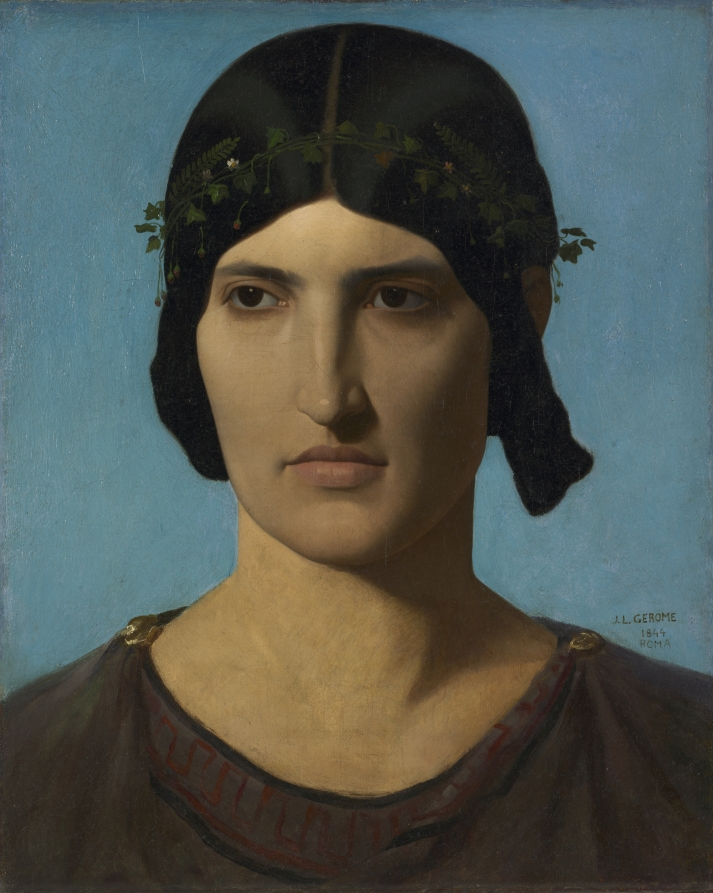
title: Head of an Italian Woman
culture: France, 19th century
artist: Jean-Léon Gérôme (French, 1824–1904)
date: c. 1847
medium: oil on fabric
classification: Painting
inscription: Signed right: j. l. gerome / 1844 / roma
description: Gérôme spent the years 1843 and 1844 in Rome, where this work was painted. The woman's severe expression and drapery recall ancient Roman statuary as well as the 19th-century belief that the essence of the antique could still be found amid the ruins and people of contemporary Rome.